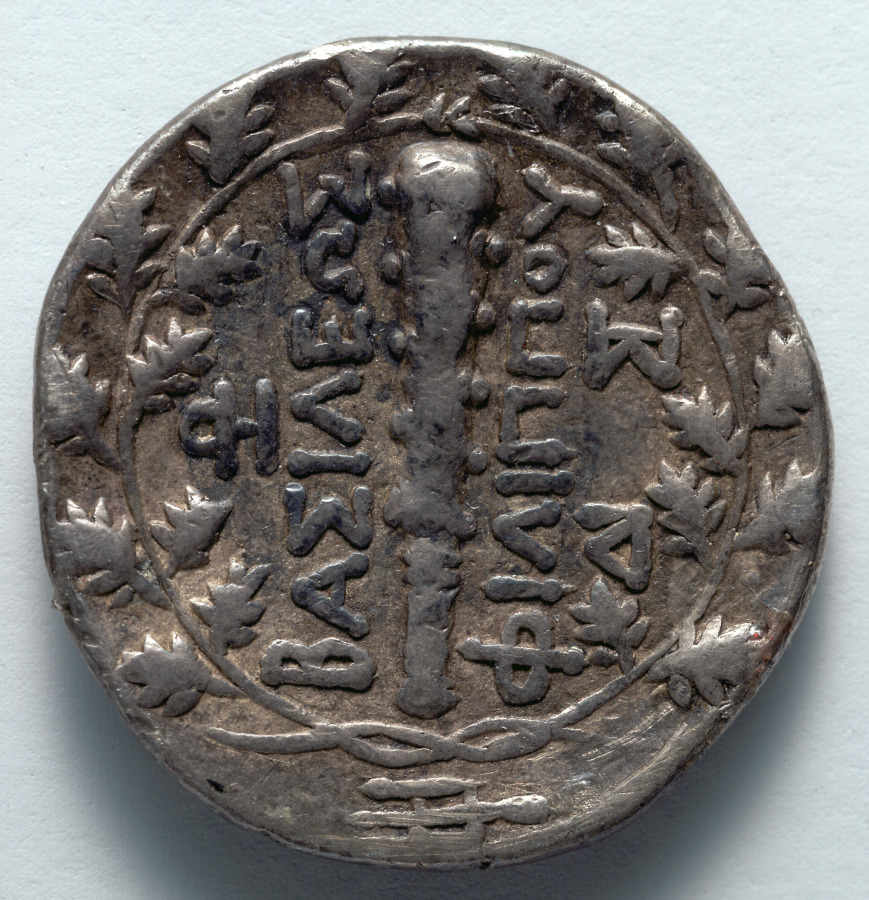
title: Didrachm: Club, within oak wreath, below, trident head (reverse)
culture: Greek, Macedonian, minted in Macedonia, reign of Philip V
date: 220–179 BCE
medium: silver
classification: Coins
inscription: ΒΑΣΙΛΕΩΣ | ΦΙΛΙΠΠΟΥ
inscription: ΔΙ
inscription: Ι within Σ